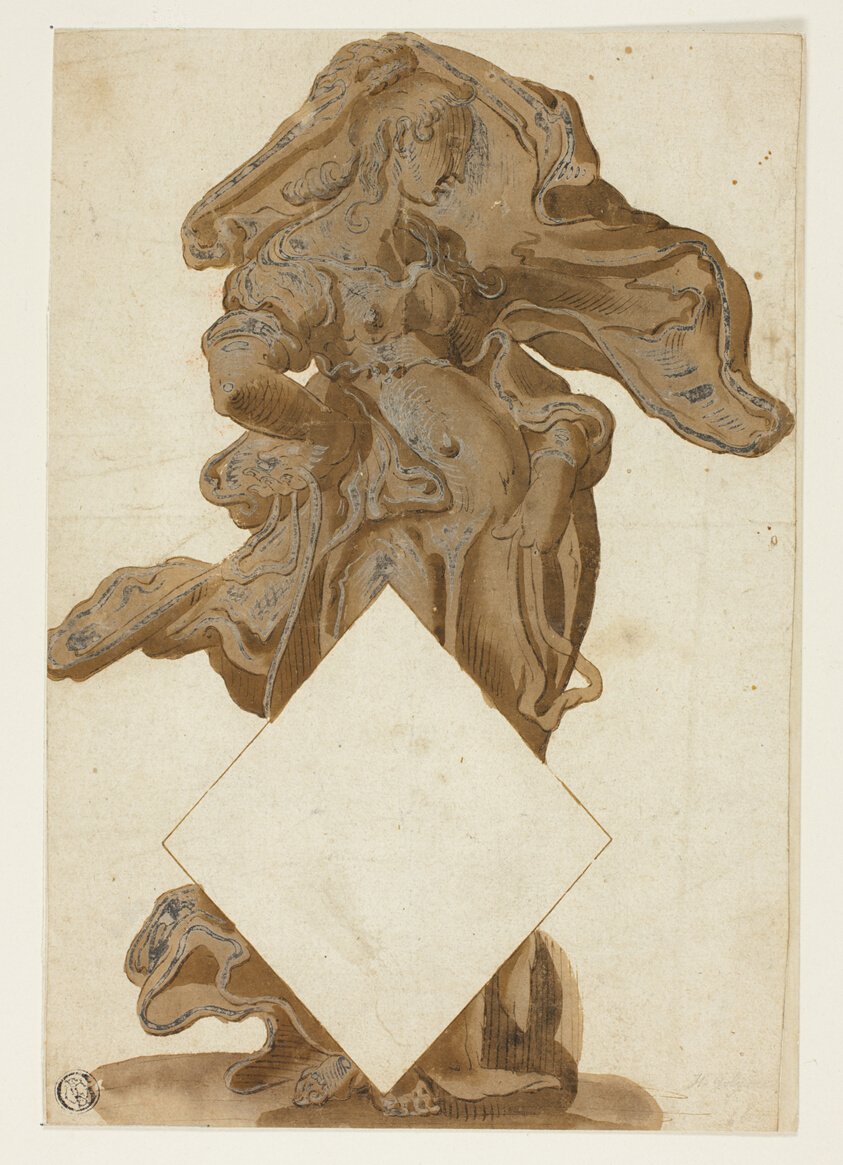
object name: Drawing and Watercolor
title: Design with Female Figure in Flowing Drapery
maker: Possibly Hendrick Goltzius (Dutch, 1558-1617); or Hubert Goltzius (Netherlandish, 1526-1583); or possibly after Joachim Wtewael (Dutch, c. 1566-1638)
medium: Pen and brown ink, with brush and brown wash, heightened with lead white (discolored), on ivory laid paper, laid down on ivory laid paper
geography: Germany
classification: ink or chalk wash; drawings (visual works); prints and drawing